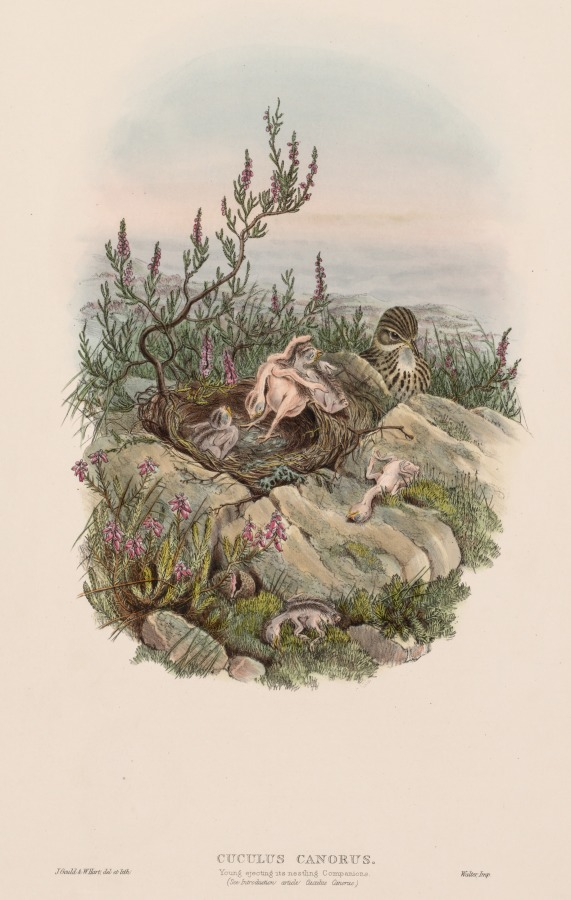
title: Cuculus Canorus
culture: England, 19th century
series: The Birds of Great Britain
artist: John Gould (British, 1804–1881)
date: 1873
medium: lithograph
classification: Print